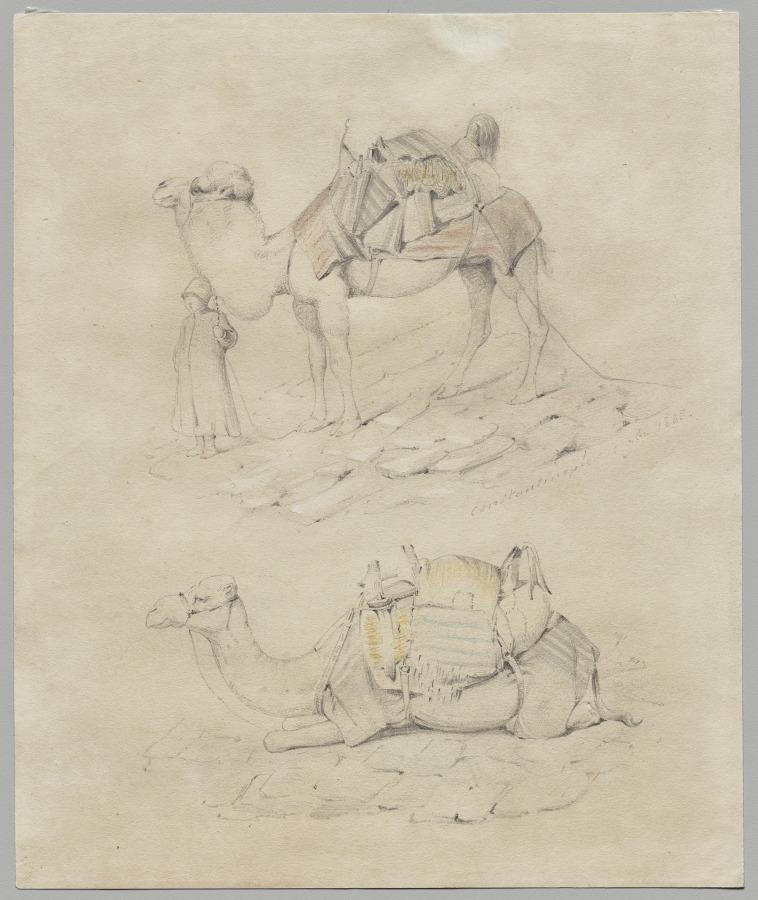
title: Study of Camels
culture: France, 19th century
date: 1848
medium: graphite with blue, red and yellow colored pencil and scraping on wove paper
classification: Drawing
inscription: inscribed at right center, below composition: Constantinople 11 octobre (?) 1848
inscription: inscribed on verso at upper right, in pencil: [illeg] Blum / 500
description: This sheet by an unknown artist was probably created during travels throughout North Africa, possibly Algeria. The country was captured by France in 1830 and annexed as part of its territories in 1848, the year this sheet was made. Numerous artists found inspiration in the culture, recording it for a French audience to whom it was unfamiliar.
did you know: This sheet is an early example featuring colored pencils, used primarily for office and clerical work at the time and less often by artists.